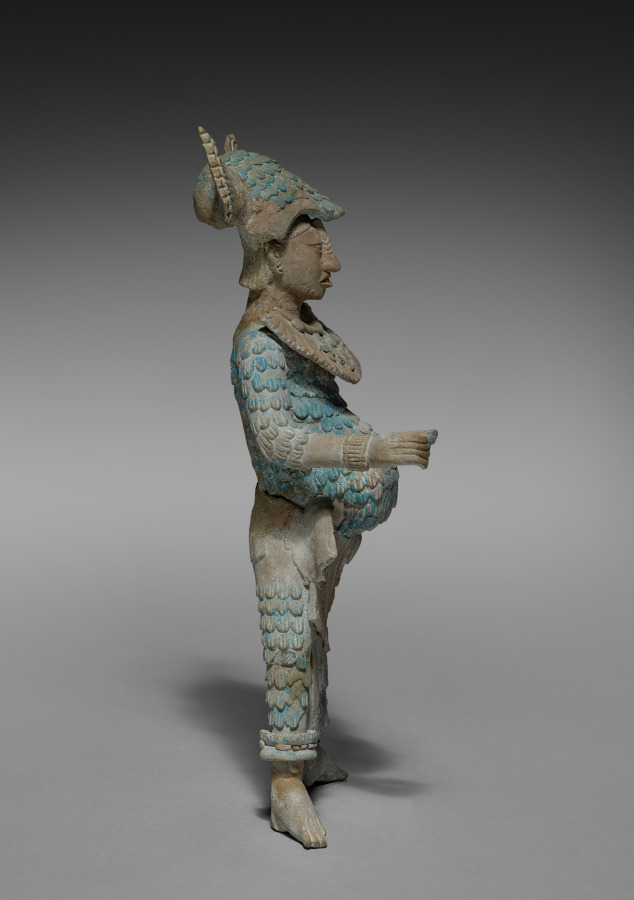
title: Warrior Figurine with Removable Headdress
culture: Mexico, Yucatán, Jaina Island region, Campeche, Maya style (250-900)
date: 600–900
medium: earthenware with pigment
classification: Sculpture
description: The major offerings placed in the Maya graves of Jaina Island were ceramic figurines, some of Mesoamerica's finest, that depict deities and humans in a variety of roles. This warrior, his headdress removable, once probably held weapons and wears either quilted cotton armor or the feathered uniform of a military order. We don't know why such figures are often pot-bellied.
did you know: Maya blue pigment was made by combining clay with indigo in a complex technique developed around the ninth century.